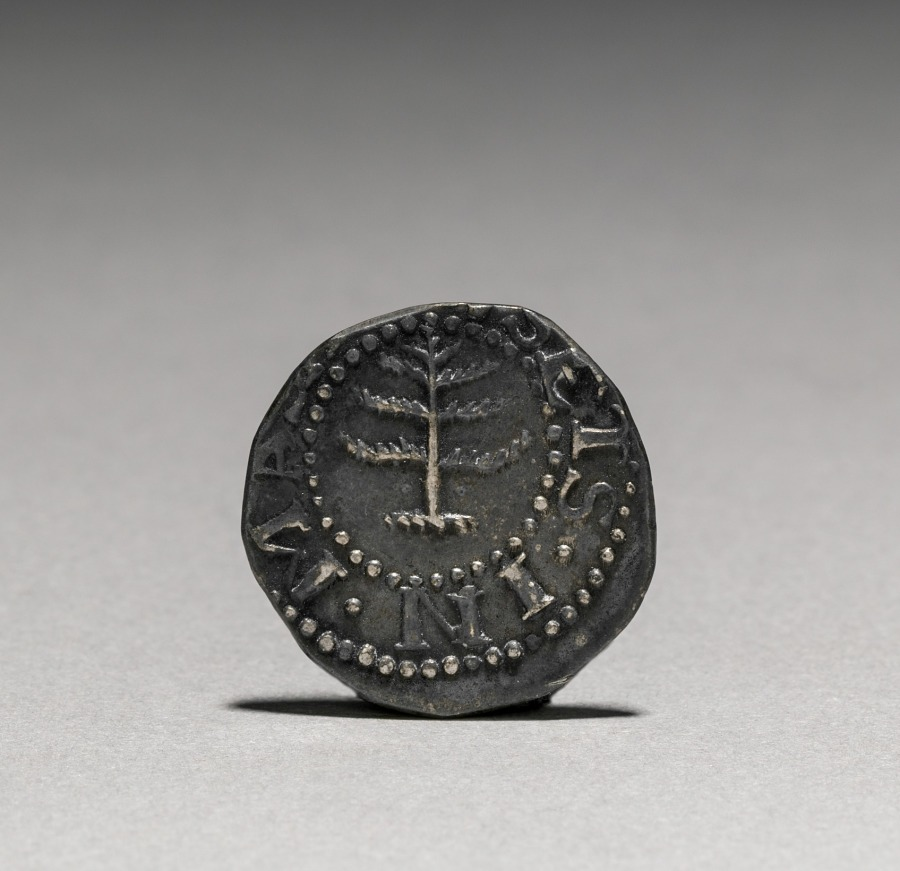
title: Sixpence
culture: America, Massachusetts, Boston, 17th century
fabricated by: John Hull (American, 1624–1683)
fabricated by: Robert Sanderson (American, 1609–1693)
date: 1652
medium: silver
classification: Coins